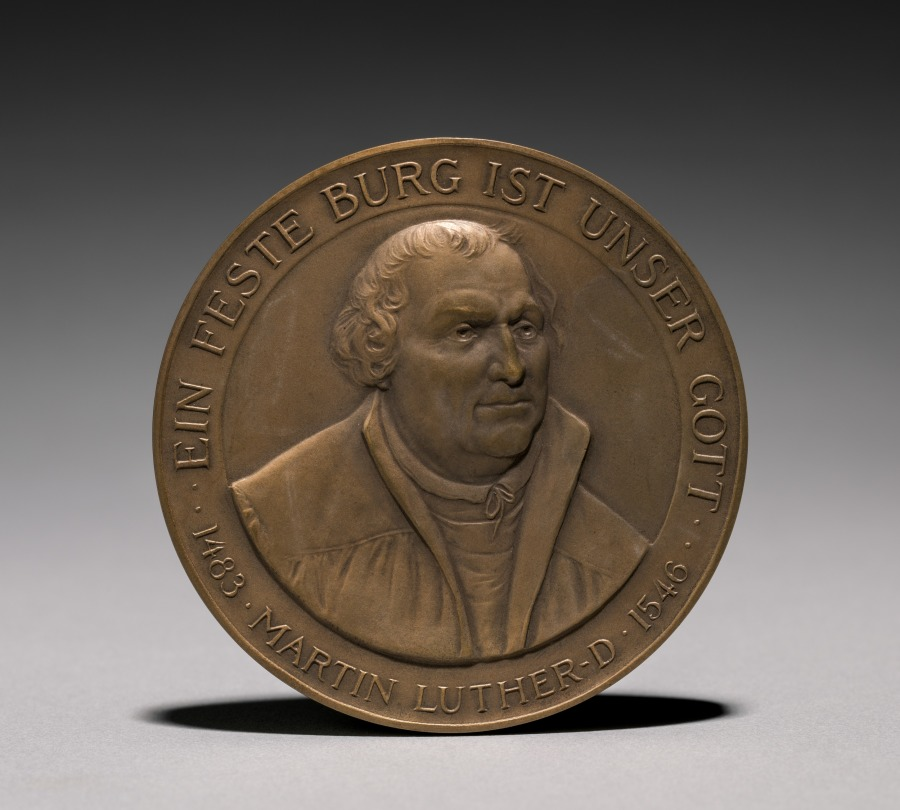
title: Medal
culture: America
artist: Jonathan M. Swanson (American, 1888–1963)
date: 1917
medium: bronze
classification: Metalwork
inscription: "1517 - 1917" (on each side of the door); "Quadricentennial of the Reformation."